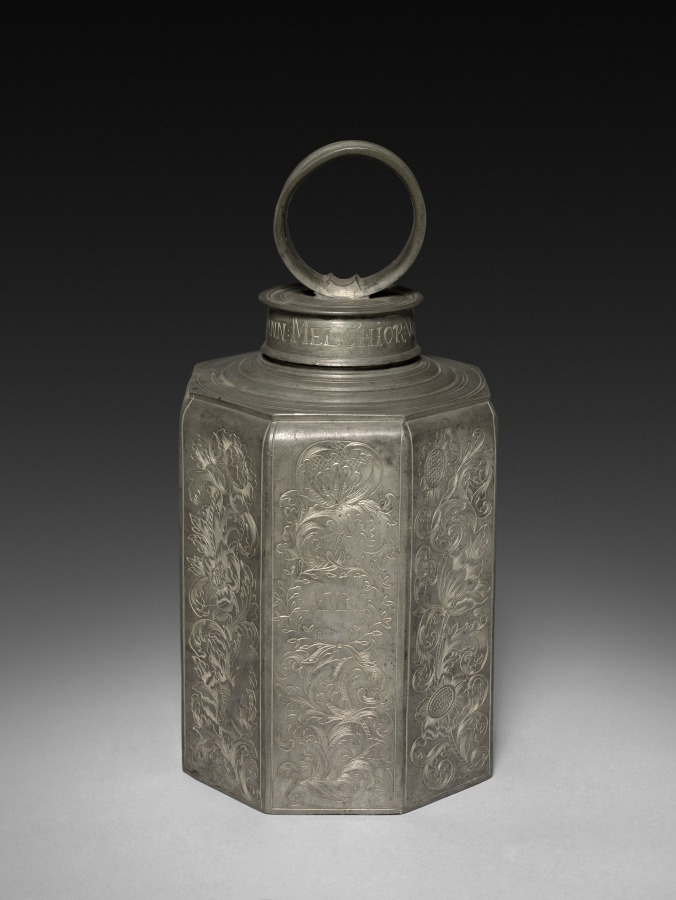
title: Cannister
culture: Germany, 18th century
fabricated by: Johann Melchoir Warner (German)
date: 1715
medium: pewter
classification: Metalwork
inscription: inscribed around the neck: "Johann Melchoir Warner, 1715."